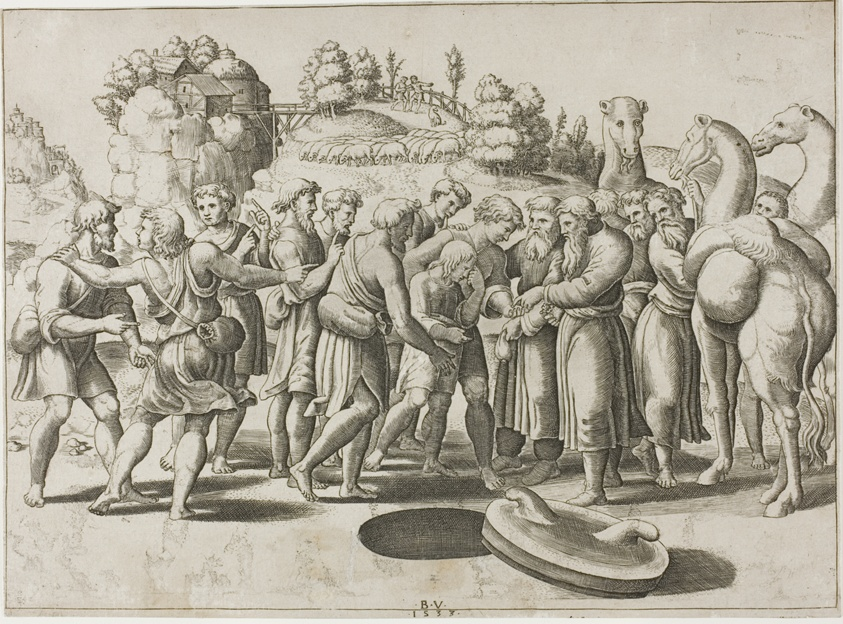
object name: Print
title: Joseph Sold by his Brothers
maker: Master of the Die (Italian, active c. 1530-1560); after Raffaello Sanzio, called Raphael (Italian, 1483-1520)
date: 1533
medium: Engraving, printed in black, on paper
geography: Italy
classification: engraving; print; prints and drawing